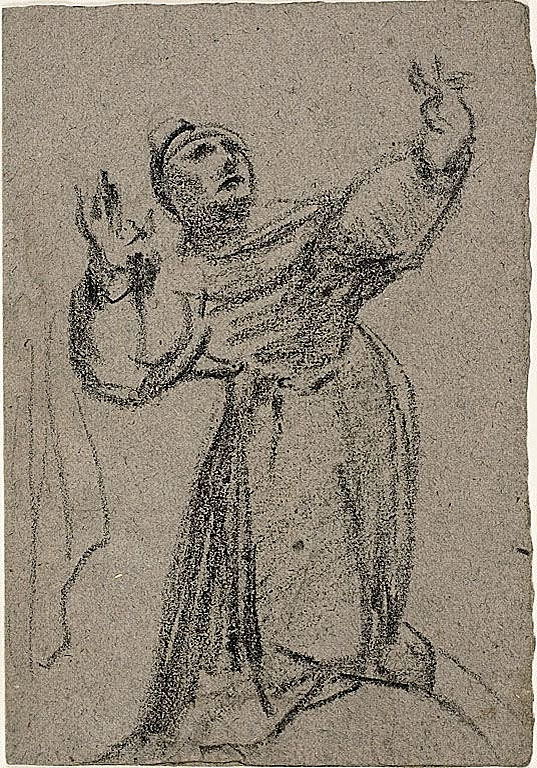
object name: Drawing and Watercolor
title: Kneeling Figure with Arms Raised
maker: Jean Baptiste Carpeaux (French, 1827-1875)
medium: Black crayon on gray laid paper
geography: France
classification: crayon; drawings (visual works); prints and drawing